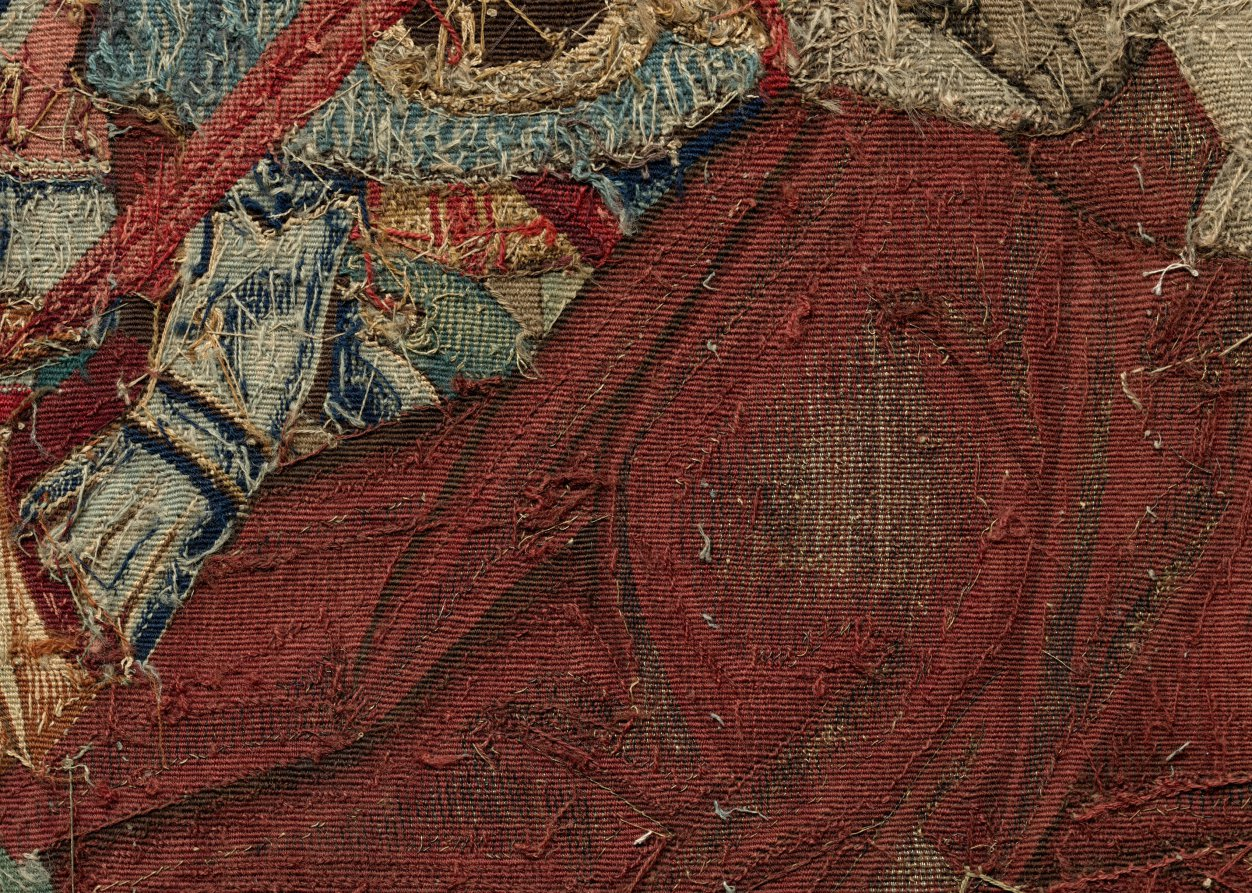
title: Altar Frontal: Scenes from the Childhood of Christ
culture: France and South Netherlands, 1500s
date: c. 1500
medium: Wool, silk, gold thread; tapestry weave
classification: Tapestry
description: Pictorial tapestries were symbols of wealth and more highly prized than paintings. Small tapestries with Christian imagery were frequently commissioned to embellish the fronts of altars. This example displays the Massacre of the Innocents, the Flight into Egypt, and Christ among the Doctors. Tapestry weave is ideal for creating narrative scenes. The technique can be compared to painting, as each colored weft (horizontal thread) is interlaced with warps (vertical thread) where needed for the pattern. As expensive investments, tapestries have the advantage of being portable and easily stored and displayed.